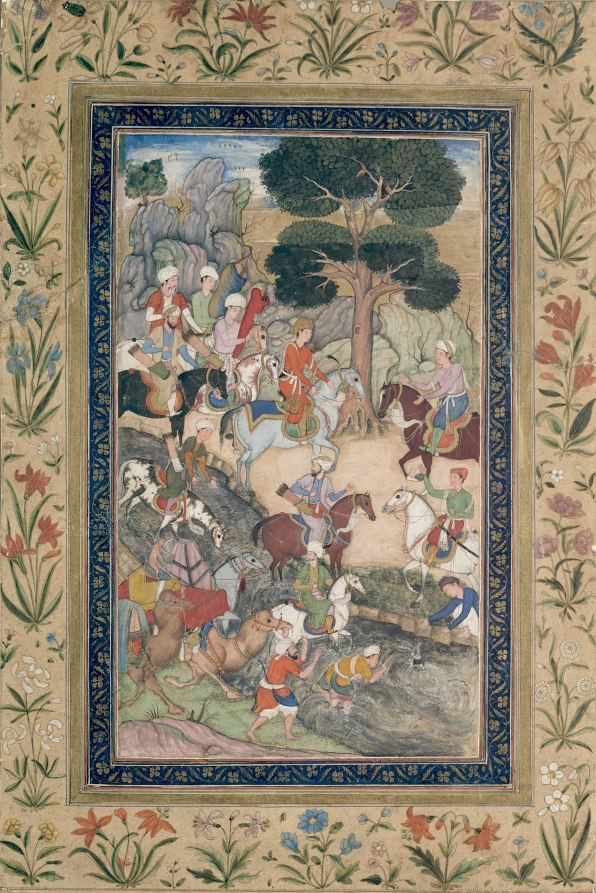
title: Babur meeting with Sultan Ali Mirza at the Kohik River, from a Babur-nama (Memoirs of Babur)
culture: India, Mughal school, 16th century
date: c. 1590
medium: Gum tempera and gold on paper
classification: Painting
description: Thirty years before he captured Delhi and founded the Mughal Empire, Babur began his expansionist activities at the age of 13, as depicted in this painting of an encounter that took place in 1496. Having traveled long distances across harsh dry terrain, Babur confronted one of his rivals who, like him, was angling to march on and conquer the illustrious city of Samarkand, the former capital of his ancestor Timur.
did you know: Camels carry collapsed tents to be pitched for nightly encampments and parties.